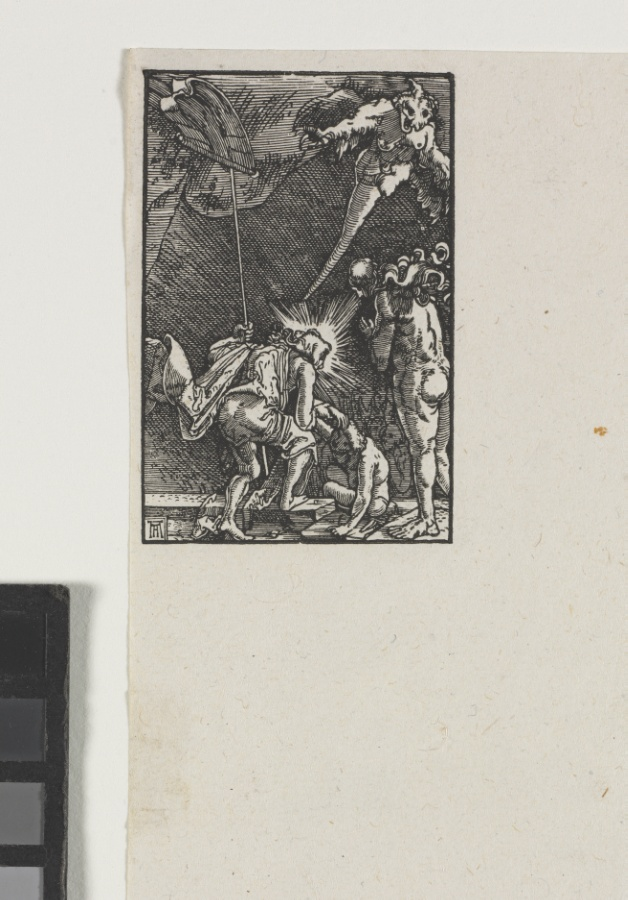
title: The Fall and Redemption of Man: Christ Descending into Hell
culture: Germany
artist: Albrecht Altdorfer (German, c. 1480–1538)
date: c. 1515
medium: woodcut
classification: Print